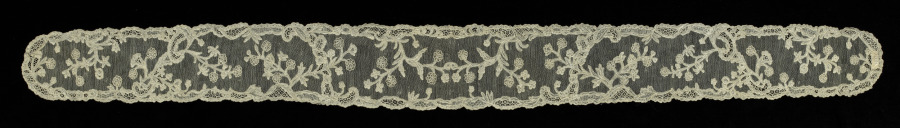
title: Lace Lappet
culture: Italy, Burano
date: 1700s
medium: Linen: needle lace (Burano Point)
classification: Lace